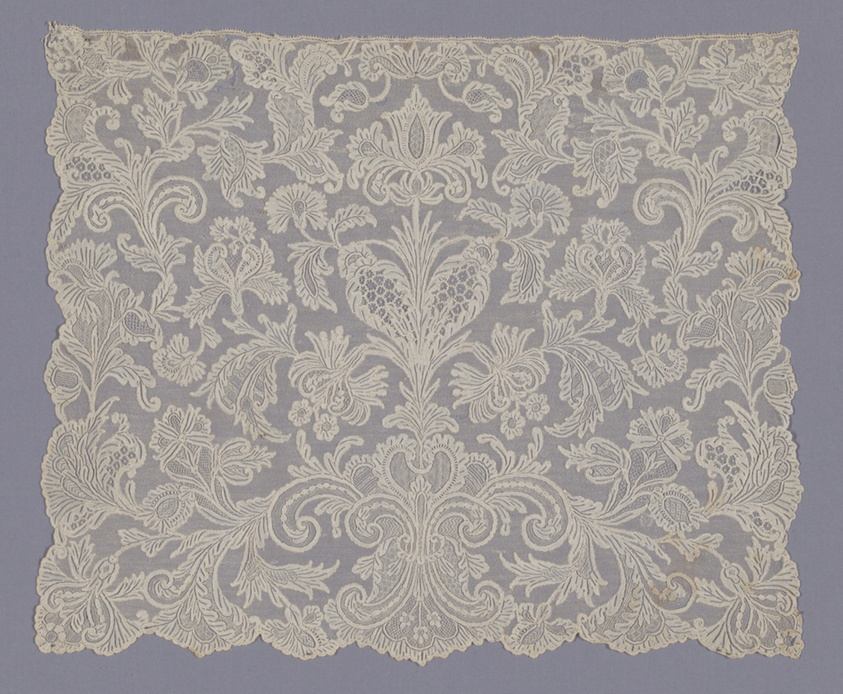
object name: Costume and Accessories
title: Cravat End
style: 18th Century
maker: Flanders, Brussels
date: 1730-50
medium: Linen, needle lace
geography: Flanders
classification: textile; lace - needle; lace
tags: tulips, floral motifs, flowers, foliage, pineapples